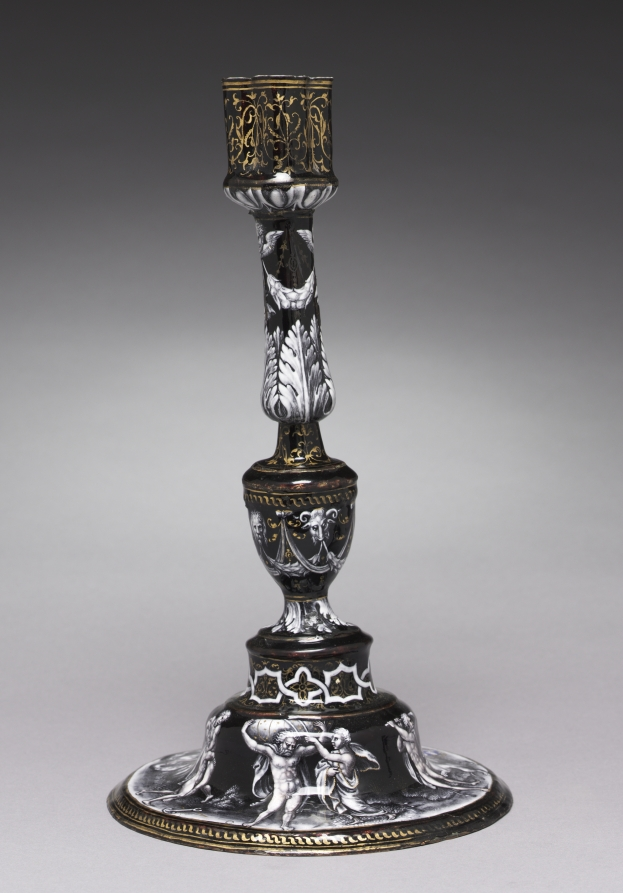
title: Candlestick Depicting Five of the Seven Labors of Hercules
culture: France, Limoges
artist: attributed to Jean II de Court (French, before 1583)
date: c. 1565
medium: painted enamel (grisaille) on copper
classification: Enamel